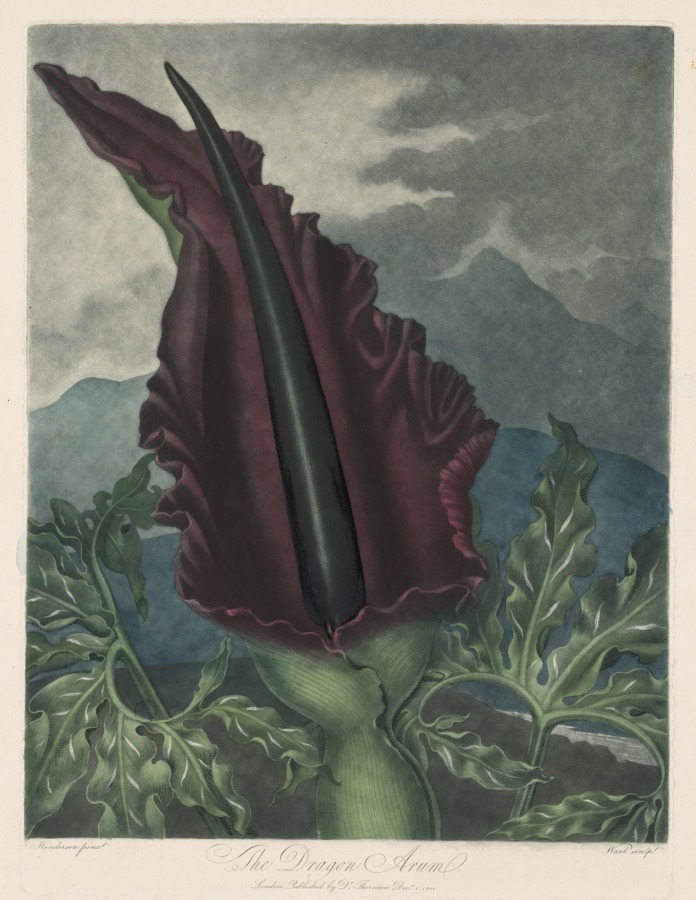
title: The Dragon Arum, Black Calla or Solomon's Lily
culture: England, late 18th-early 19th Century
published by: Robert John Thornton (British, 1768–1837)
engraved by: William Ward (British, 1776–1826)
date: 1799–1807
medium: mezzotint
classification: Print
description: In the 18th century, new engraving and etching techniques offered a variety of tonal effects that enhanced botanical prints. While mezzotint (in which the plate is roughened and then the engraver works from dark to light creating different values) and stipple (dots create values) make it possible to create the rich tonal scale and velvety texture of oil paint, aquatint imitates the delicacy and transparency of watercolor and ink wash.